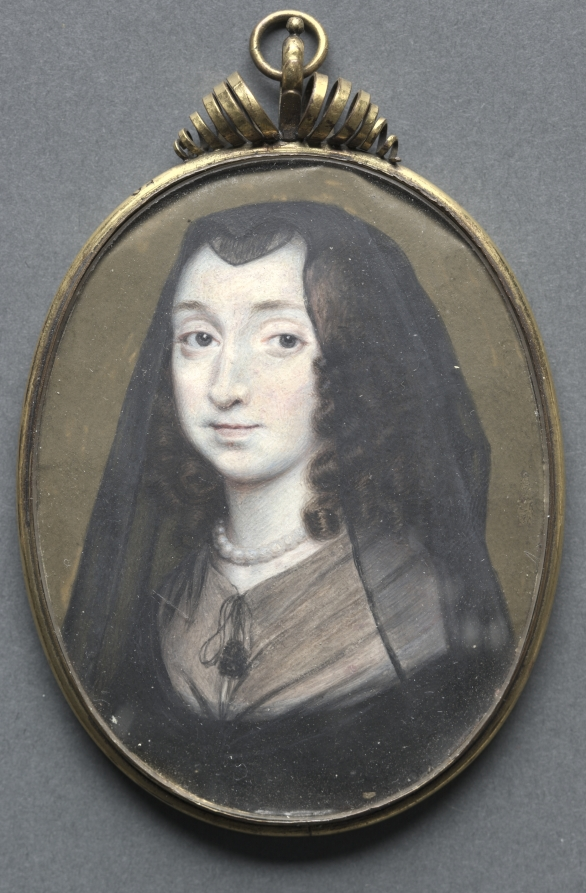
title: Portrait of Elizabeth Morrison, Lady Capell of Hadham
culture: England, 17th century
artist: Richard Gibson (British, c. 1615–1690)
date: c. 1650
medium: watercolor on vellum in a silver gilt frame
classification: Portrait Miniature